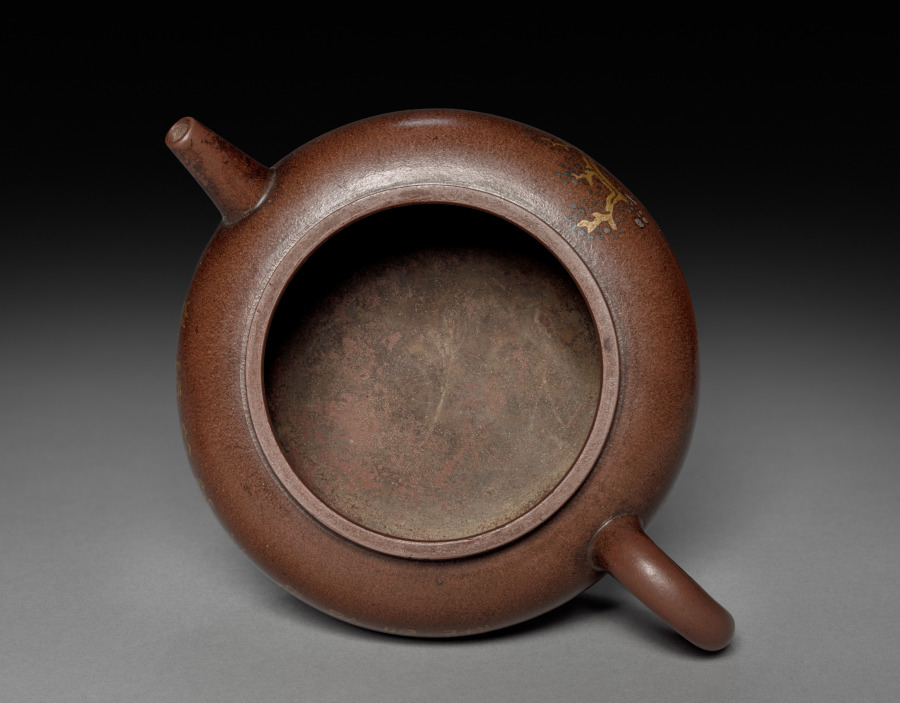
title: Teapot with Landscape and Imperial Poem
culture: China, Jiangsu province, Yixing, Qing dynasty (1644–1911), Qianlong reign (1736–95)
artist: Chen Hanwen (Chinese, active c. 1720s–90s)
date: 1762–95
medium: Stoneware, with gold pigment, Yixing ware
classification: Ceramic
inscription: 陳漢文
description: This teapot with a polished surface shows an imperial poem in gold on one side and a landscape on the other. The poem in archaic seal script was composed by the Qianlong emperor on his third southern inspection tour in 1762, when he traveled to southern China to solidify his rule. The base bears a stamped seal of its maker. Yixing potters produced teapots primarily for Ming dynasty literati-officials who valued simplicity and restraint, until the early Qing emperors introduced them at court.